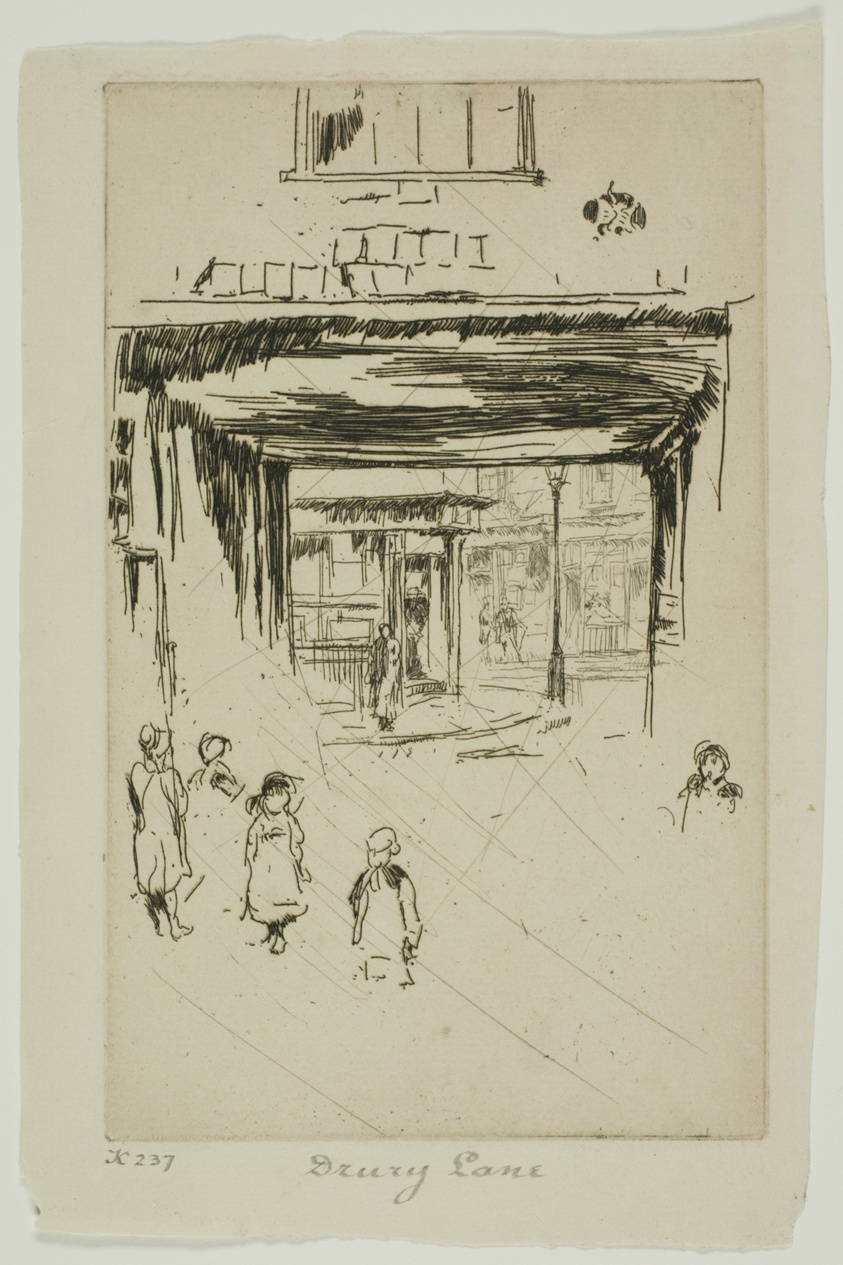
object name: Print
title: Drury Lane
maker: James McNeill Whistler (American, 1834-1903)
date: 1880/81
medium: Etching with foul biting, with drypoint cancellation, in brown ink on ivory laid paper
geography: United States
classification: etching; print; prints and drawing; drypoint; foul biting; paper